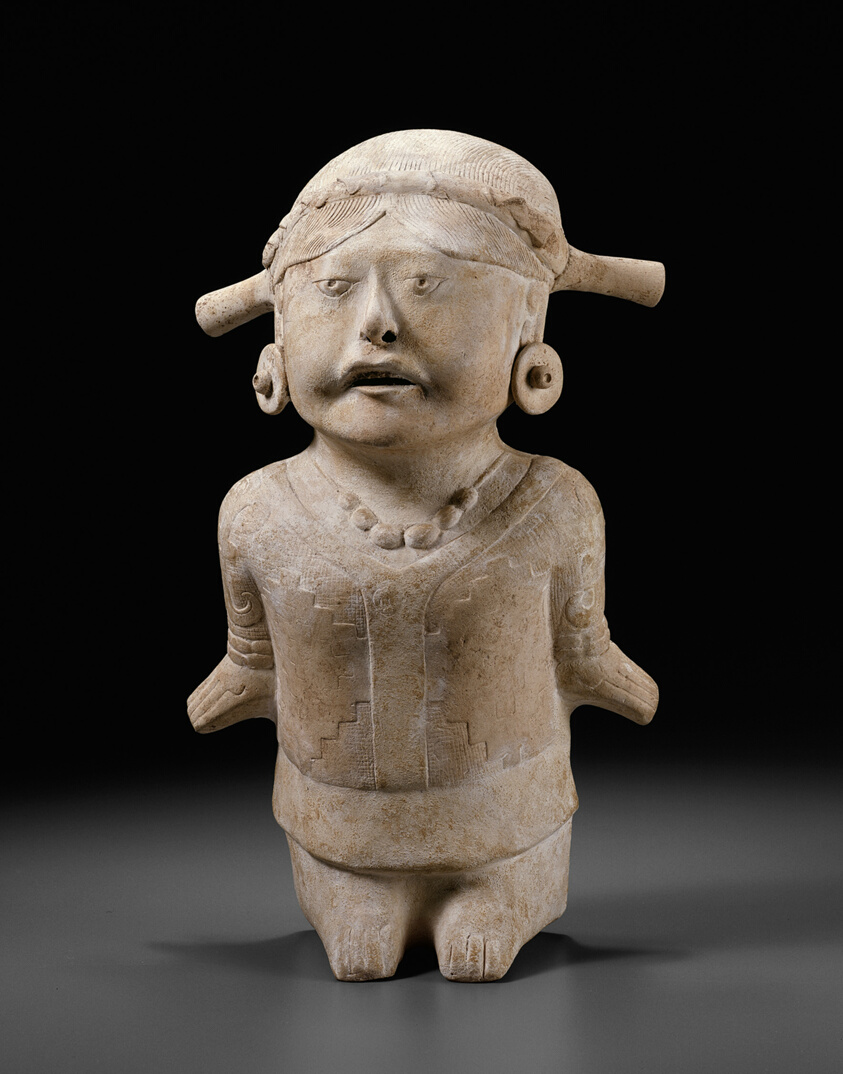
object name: Sculpture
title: Figure of a Woman in Ceremonial Dress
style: Nōpiloa, late classic, classic, mesoamerican, Pre-Columbian, americas, classic veracruz, totonac, Arts of the Americas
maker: Possibly Totonac, Nopiloa; Veracruz, south-central Gulf Coast, Mexico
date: 700–900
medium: Ceramic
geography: Southern Veracruz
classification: earthenware; ceramics; sculpture; art of the americas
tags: people, textile pattern, female, costume